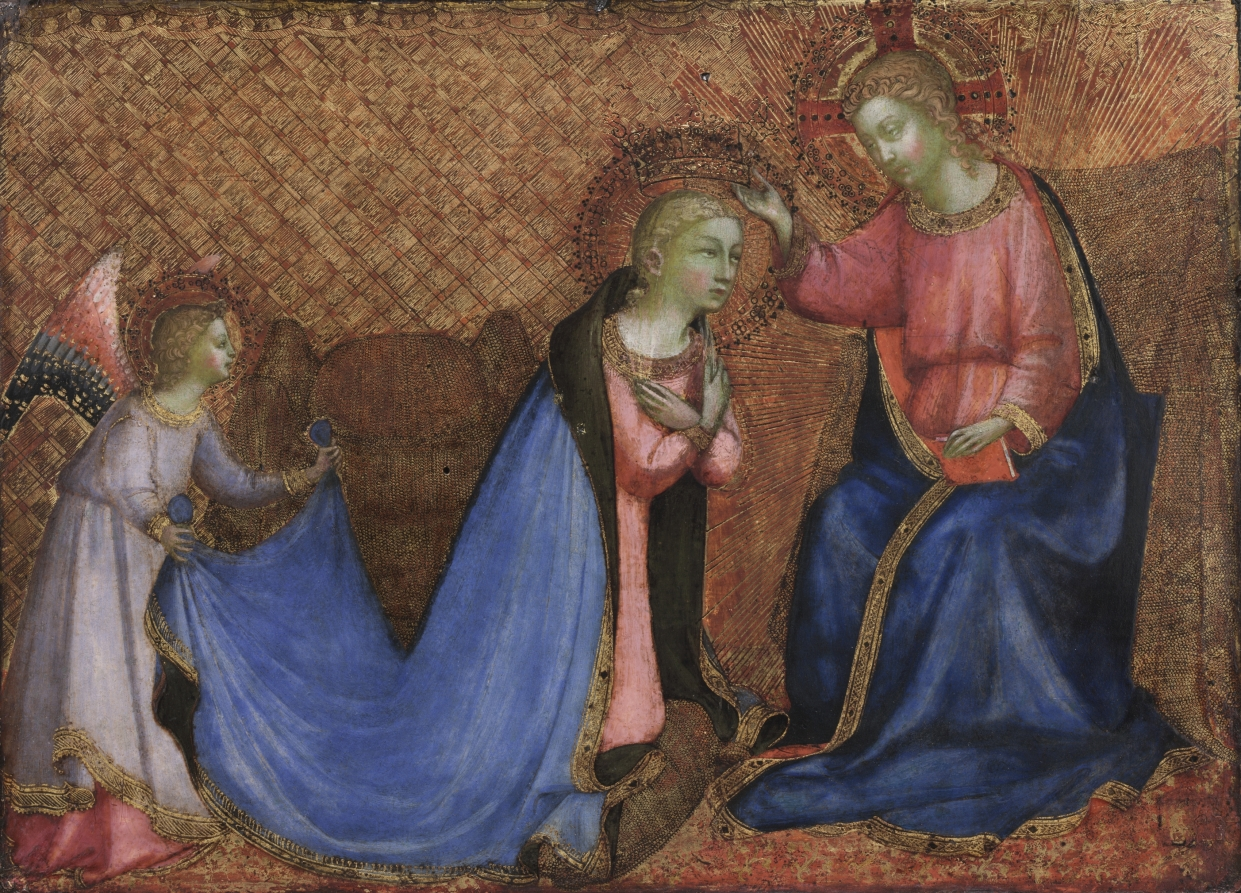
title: Coronation of the Virgin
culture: Italy, Florence, 15th century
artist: Fra Angelico (Italian, 1400–1455)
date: 1420s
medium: tempera and gold on wood panel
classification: Painting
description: This picture’s original use is uncertain. Its size and shape are appropriate for a predella (the pedestal portion of an altarpiece), which often consists of several small panels. However, the Coronation of the Virgin almost never appears on predellas. The panel’s minute detail and rich finish suggest it may have been an object for private devotion. This is believed to be an early work by Fra Angelico, whose real name was Guido di Pietro, a Dominican monk in Florence. Here, an angel holds the Virgin’s train while she kneels to receive the crown offered by Christ. The scene glimmers with gold; the thrones are draped with starry tapestries, the walls are hung with gold cloth, and Christ himself radiates light.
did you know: Since its acquisition in 1944 the authorship of this painting has been updated from the workshop of Fra Angelico to the master himself.